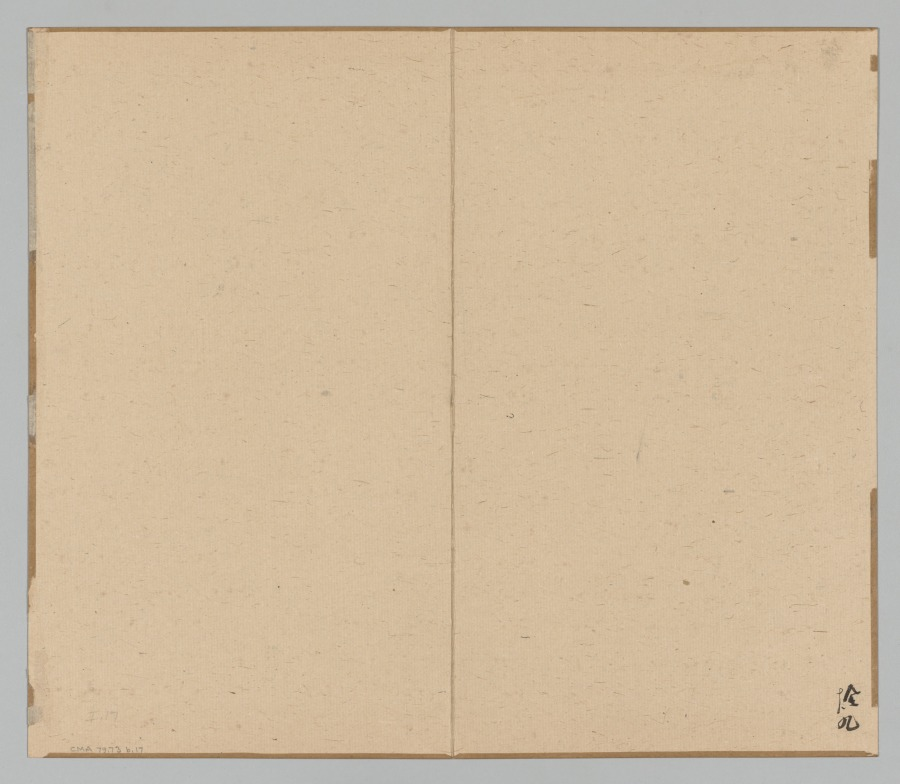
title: Reverberations of Taiga, Volume 2 (leaf 17)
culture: Japan, Edo period (1615–1868)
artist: Aoki Shukuya (Japanese, d. 1802)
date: mid- to late 1700s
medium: double-leaf from a pair of albums; ink and light color on paper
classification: Portfolio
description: Traditionally, young painters in Japan began their studies with an established master-painter. The master's compositions invariably became models that the apprentice copied to learn various ink and brush techniques. Shukuya was a pupil of the famous Kyoto artist Ikeno Taiga, whose style is reflected in these sketches of rocks, trees, and mountains.